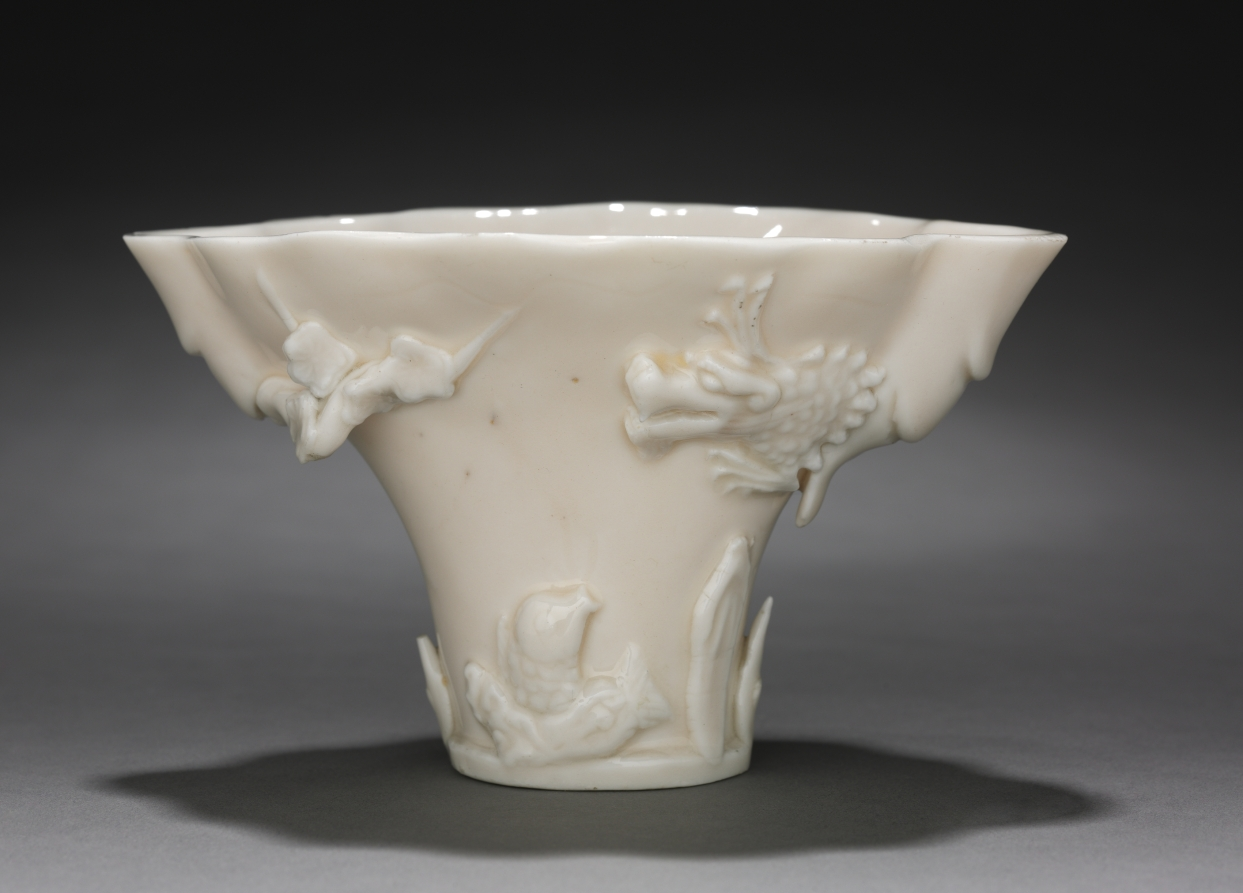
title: Libation Cup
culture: China, Qing dynasty (1644-1911), Kangxi reign (1661-1722)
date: 1662–1722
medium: porcelain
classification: Ceramic